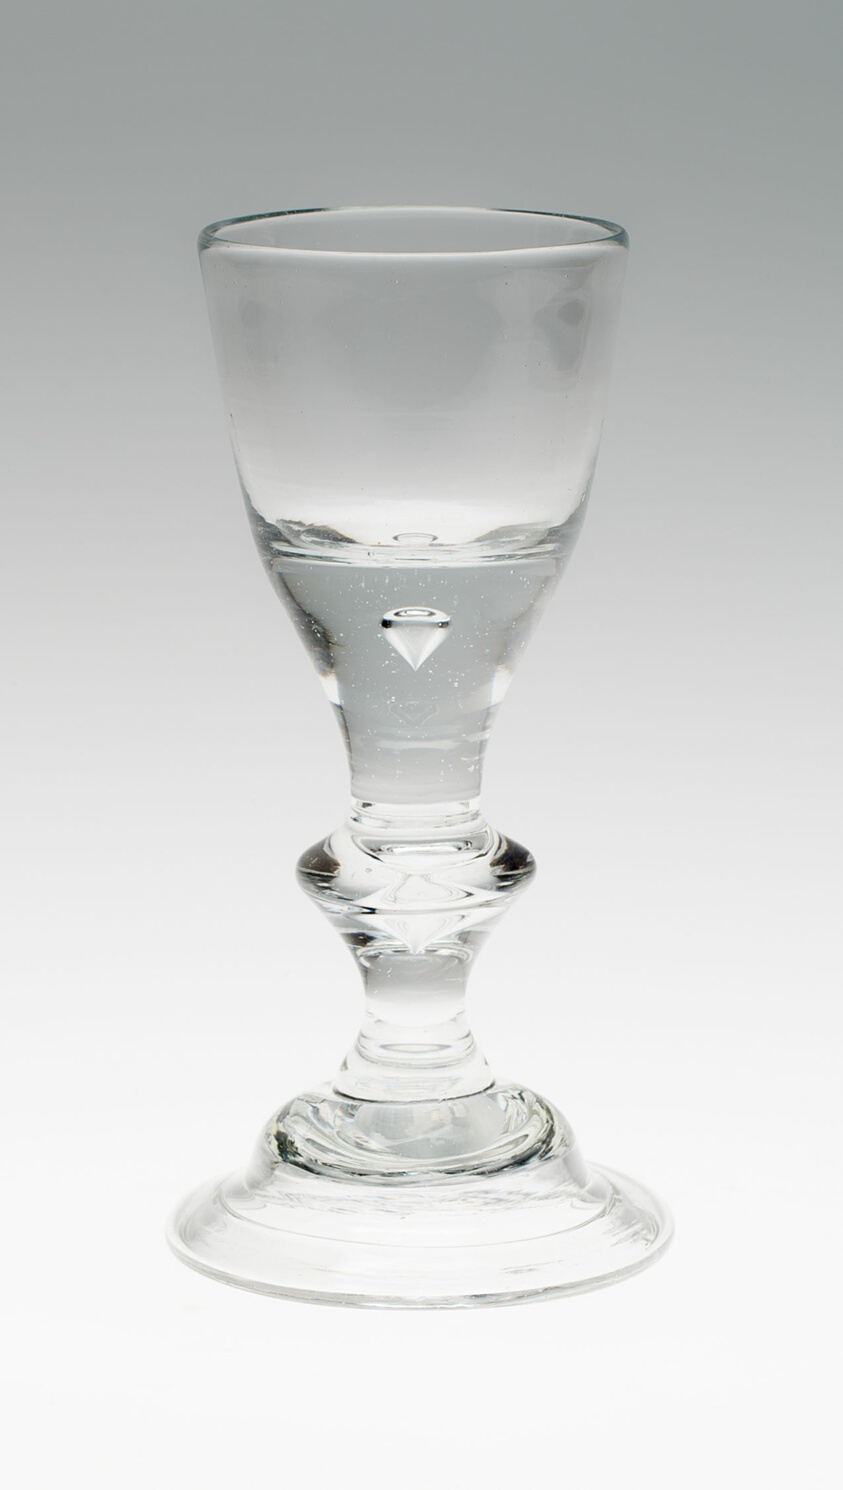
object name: Glass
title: Wine Glass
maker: England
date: c. 1720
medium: Glass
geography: England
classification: drinking vessel; glass; european decorative arts